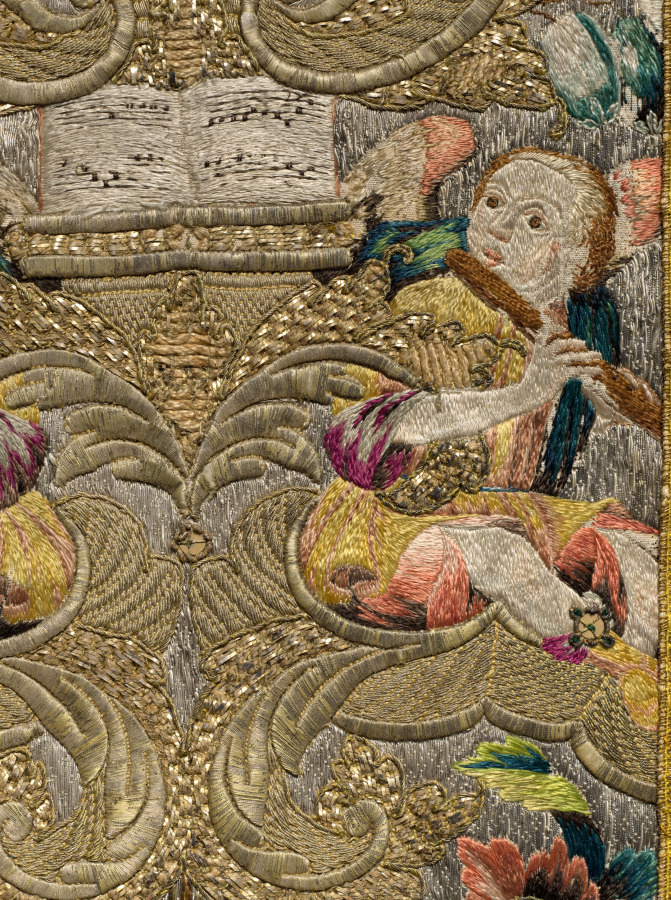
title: Chasuble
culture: Germany, Bavaria, last quarter of 17th century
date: 1675–99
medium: Silk and metallic threads on silk tabby sewn down on a linen tabby ground; embroidery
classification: Embroidery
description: This rare chasuble decorated with angels, musicians, pomegranates, and flowers represents Sacred and Profane Love. This is indicated by two figures—a clear-sighted figure embracing a blindfolded figure—standing on a globe in the upper center and also by the musicians. The angels play soft-sounding instruments (harpsichords, harps, viole da barccio, and flutes) while earthy figures play loud instruments (tambours and hunting horns). The chasuble was most likely part of a liturgical set commissioned for a wedding. This entire chasuble is embroidered with silk and metal thread laid over linen and stitched in place. The exceptionally fine workmanship, lavish use of gold and silver, and brilliant silk thread create this sumptuous vestment.